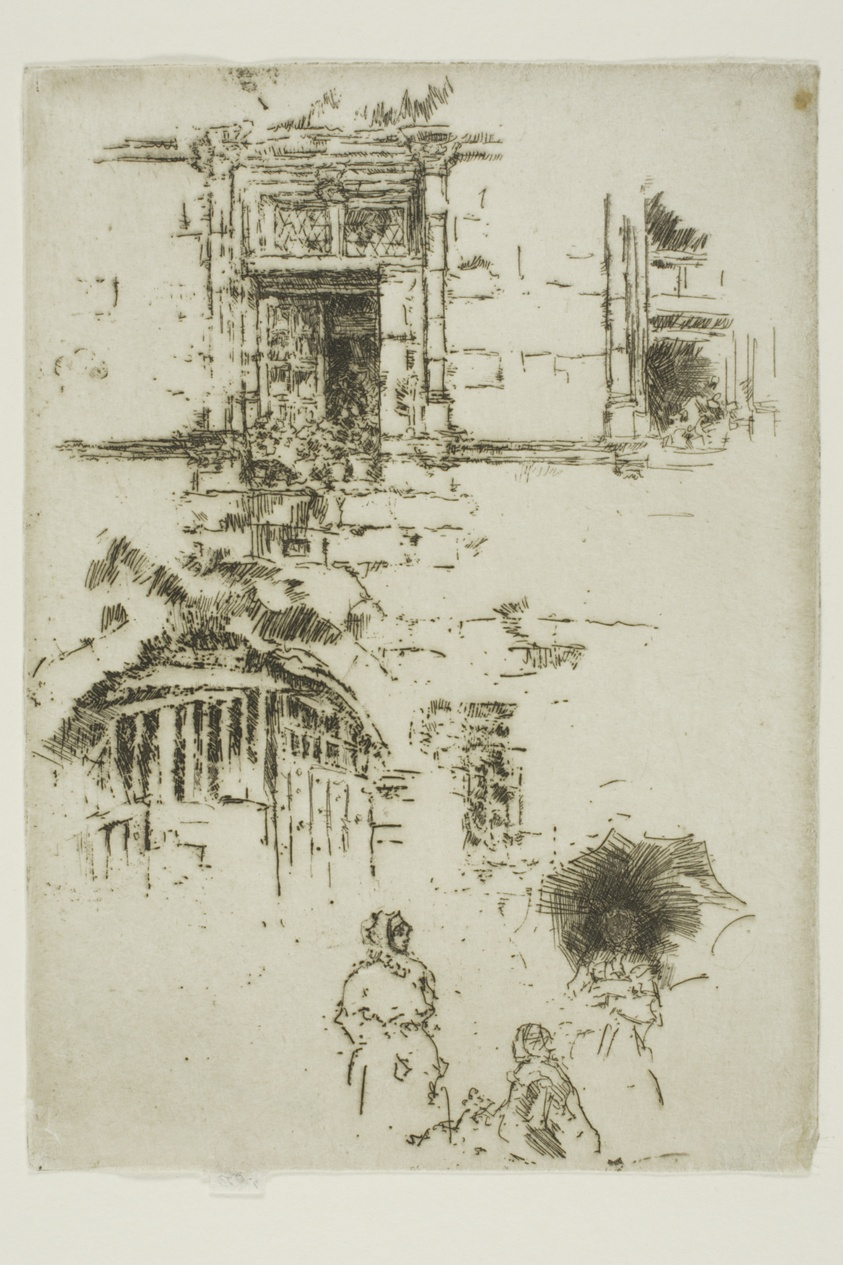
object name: Print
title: Renaissance Window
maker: James McNeill Whistler (American, 1834-1903)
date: 1888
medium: Etching and drypoint with foul biting in dark brown ink on Japanese paper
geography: United States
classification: etching; foul biting; print; prints and drawing; paper; drypoint